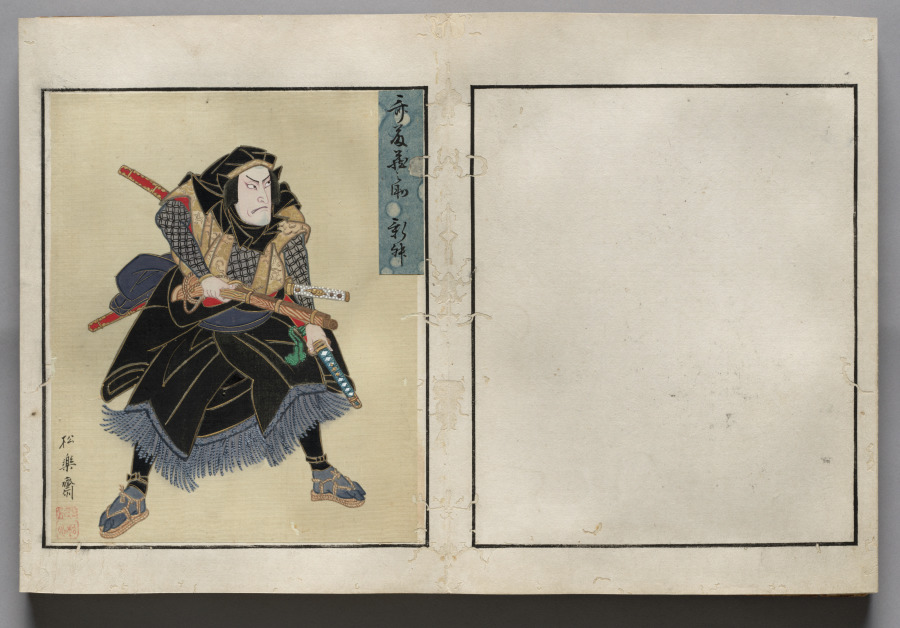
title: Double-Leaf from Album of Actor Portraits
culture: Japan, Edo period (1615–1868)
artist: Shōrakusai (Japanese)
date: c. 1790–1810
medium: double-leaf from an accordion-style album; ink and color on silk (left)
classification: Bound Volume